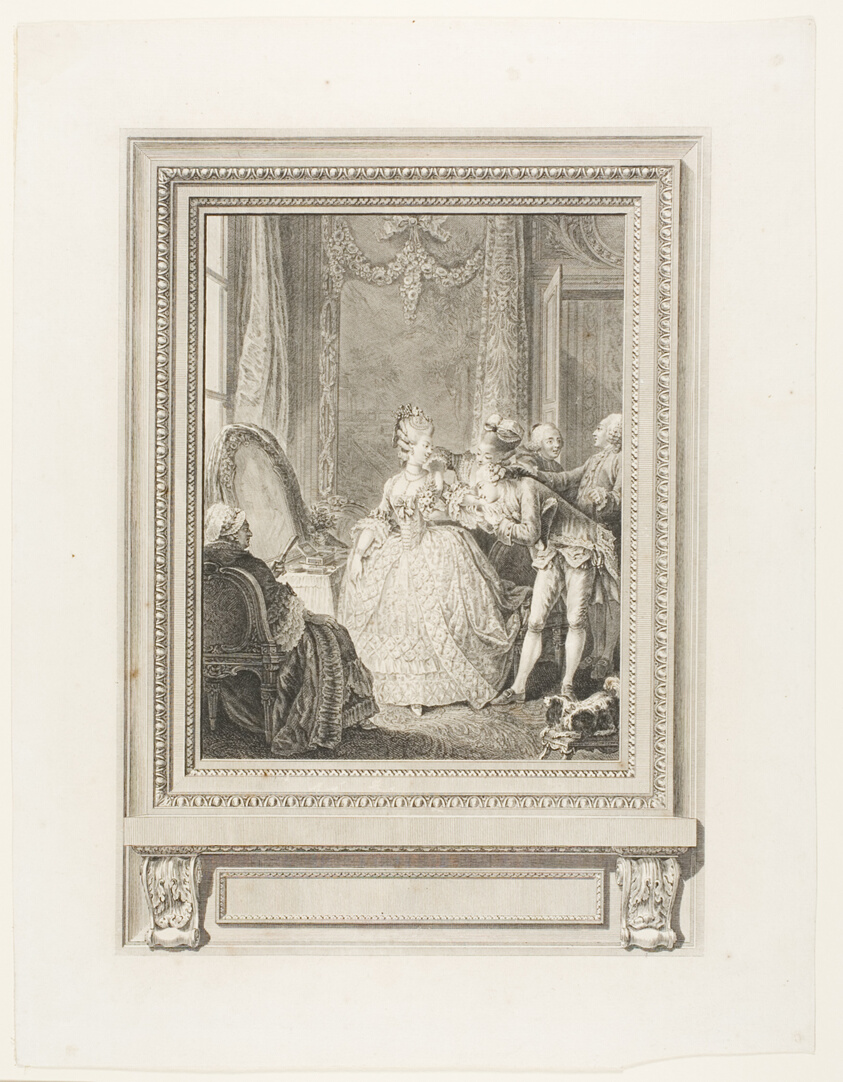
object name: Print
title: Day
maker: Charles Emmanuel Patas (French, 1744-1802); after Charles Eisen (French, 1720-1778)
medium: Engraving on paper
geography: France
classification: etching; print; prints and drawing